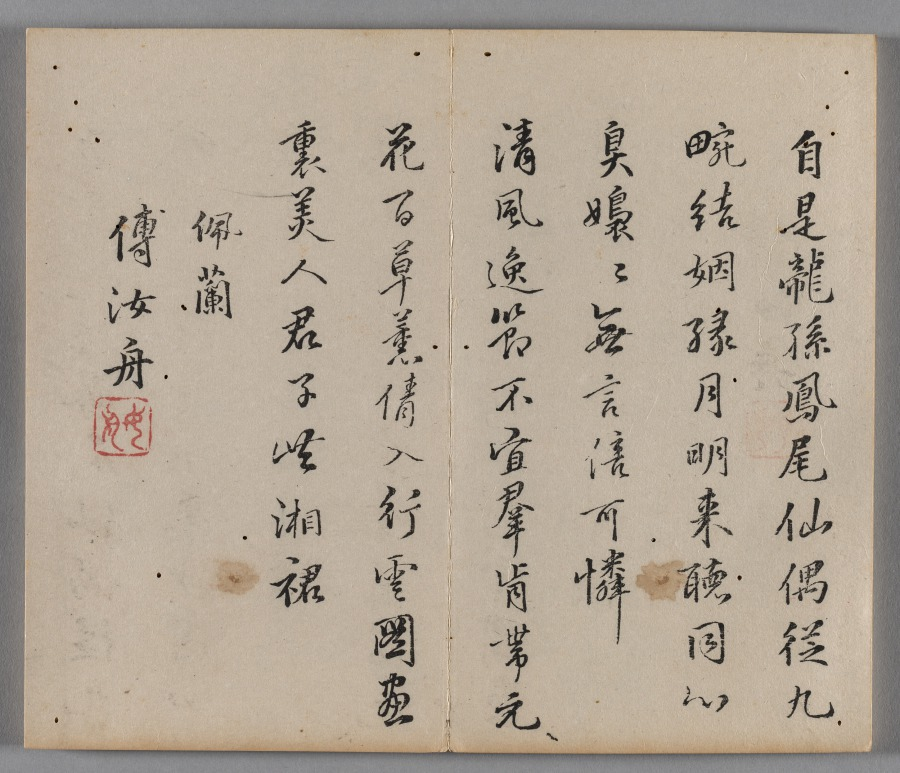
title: Ten Bamboo Studio Painting and Calligraphy Handbook (Shizhuzhai shuhua pu): Bamboo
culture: China, Qing dynasty (1644-1911)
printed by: Hu Zhengyan (Chinese, c. 1584–1674)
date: 1633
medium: Woodblock-printed book; ink and colors on paper; first edition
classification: Print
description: Color printing reached a level of perfection in the early 1600s, as seen in this Ten Bamboo Studio Collection of Calligraphy and Painting and the Mustard Seed Garden Manual of Painting (printed 1679 and 1701). The painterly quality, precision in registering (aligning) the woodblocks, and harmonious colors made them the most successful color print editions in Chinese history. Both editions were printed and compiled in Nanjing, spread nationwide, and had a great impact on the arts in Japan and Korea.